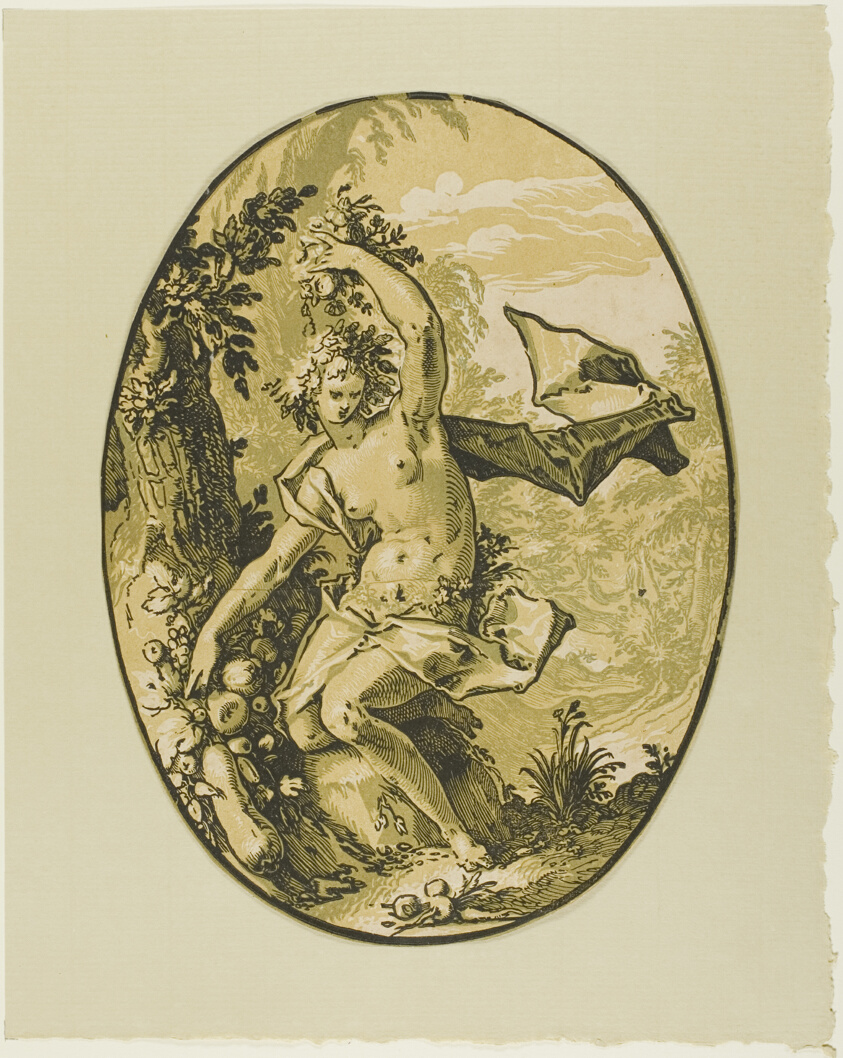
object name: Print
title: Proserpine, plate five from Demogorgon and the Deities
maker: Hendrick Goltzius; Dutch, 1558-1617; second edition printing by Willem Jansz. Blaeu; Amsterdam, 1605-1620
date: c. 1588–90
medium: Chiaroscuro woodcut from three blocks in black, ochre, and green on paper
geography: Netherlands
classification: woodcut; print; prints and drawing